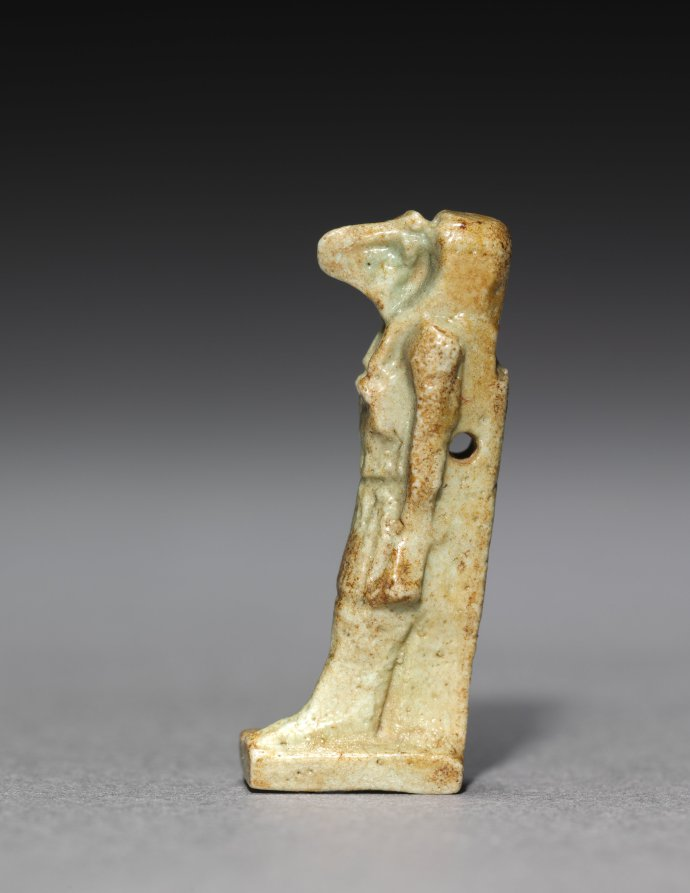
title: Amulet of Thoth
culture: Egypt, Late period (715–332 BCE), Dynasty 30–Greco-Roman period (332 BCE–395 CE), Ptolemaic dynasty (305–30 BCE)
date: 380–30 BCE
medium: gray green faience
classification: Amulets